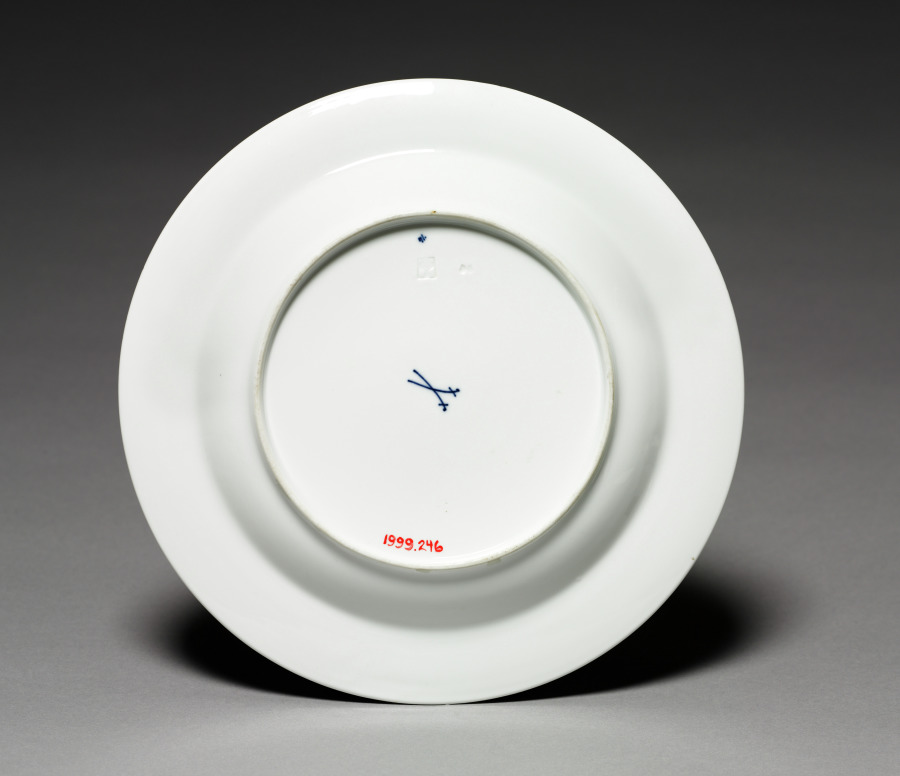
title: Plate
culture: Germany, Meissen, early 20th Century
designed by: Henry C. Van de Velde (Belgian, 1863–1957)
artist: firm of Meissen Porcelain Factory (German, est. c. 1710)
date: c. 1903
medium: porcelain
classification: Ceramic